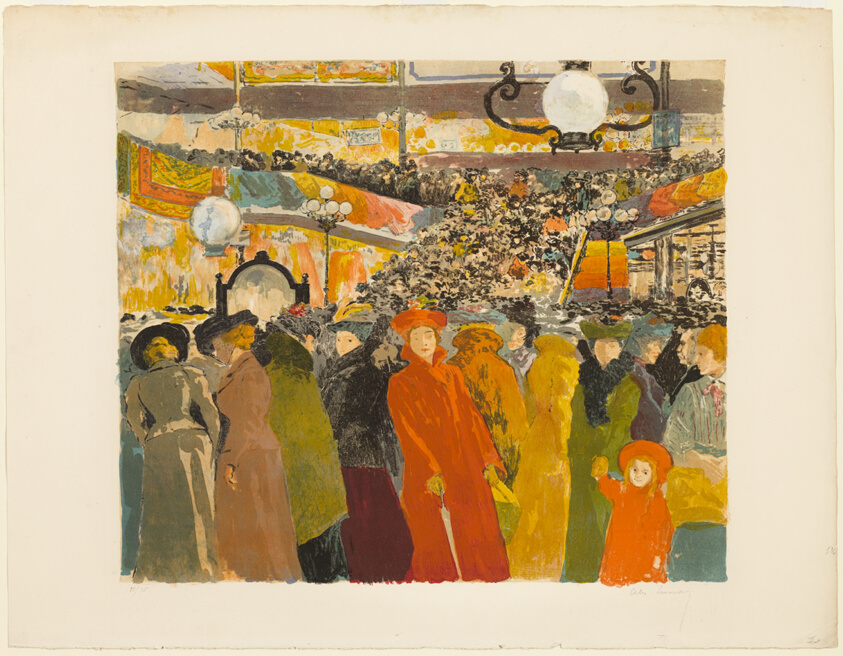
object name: Print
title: Le magazin de nouveautes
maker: Alexandre Lunois (French, 1863-1916)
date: 1902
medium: Lithograph on paper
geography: France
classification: lithograph; print; prints and drawing